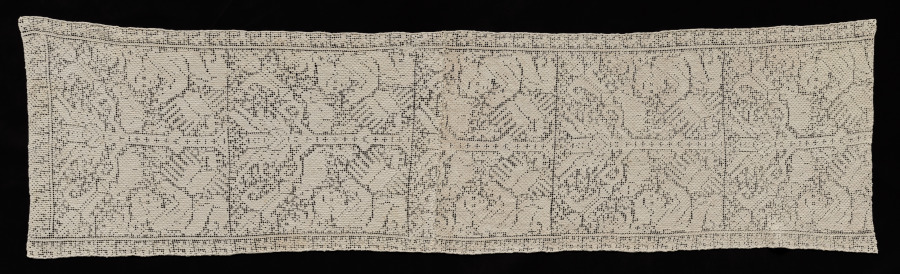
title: Panel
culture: Spain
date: 1800s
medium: Linen: needle lace, filet/lacis (knotted ground and darned in two directions)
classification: Lace